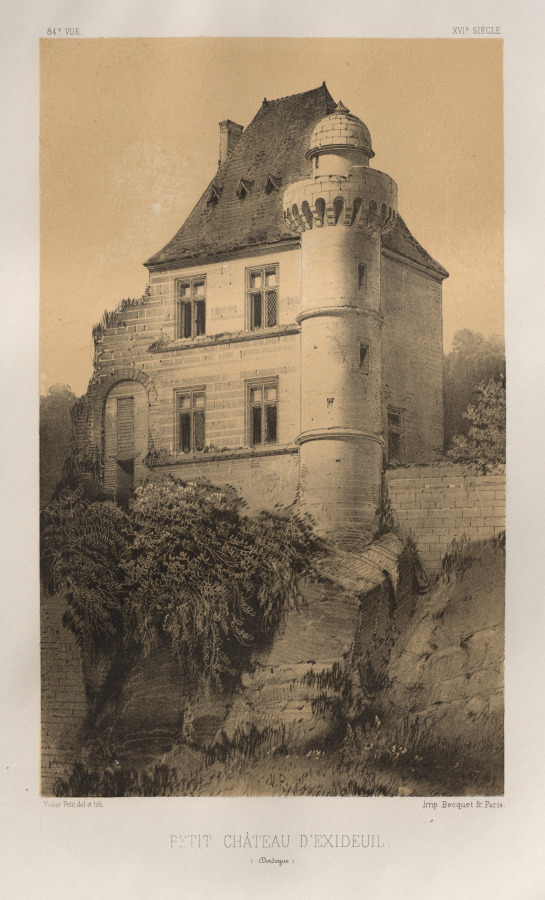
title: Architecture Pittoresque ou Monuments des XVeme. Et XVIeme. Siecles: Chateaux de France des XV et XVI Siecles: Pl. 84, Petit Château d'Exideuil (Dordogne)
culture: France, 19th century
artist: Victor Petit (French, 1817–1874)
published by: Charles Boivin (publisher and editor); Lith de Godard a Paris (printer)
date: 1860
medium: lithograph with tint stone, from portfolio of 100 lithographs with tint stone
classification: Print